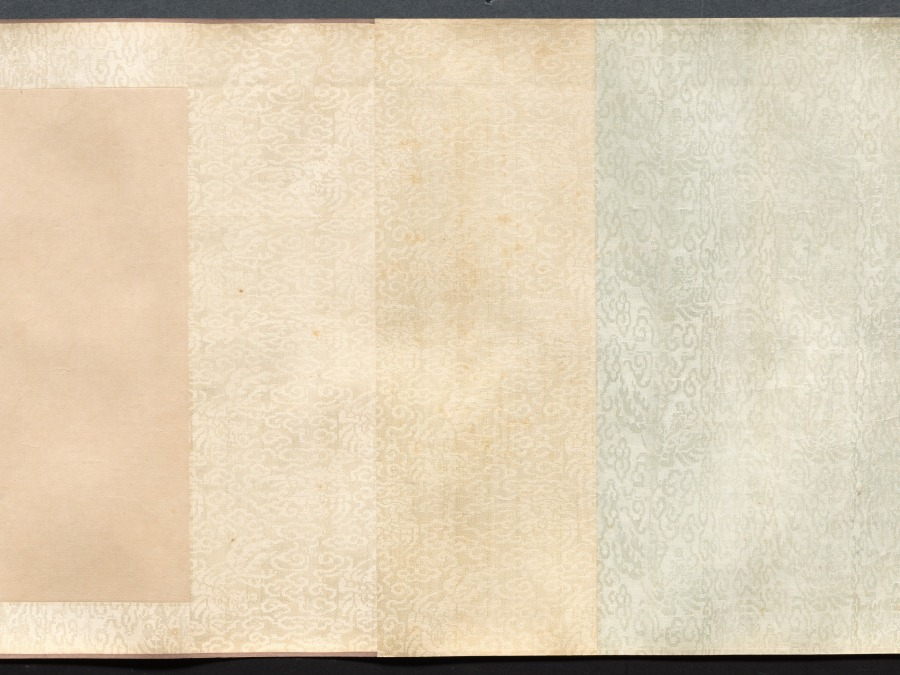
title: Four Poems: Calligraphy in Cursive Script (xingshu)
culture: China, Ming dynasty (1368–1644)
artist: Chen Jiru (Chinese, 1558–1639)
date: 1500s-1600s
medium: handscroll; ink on gold speckled paper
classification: Calligraphy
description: Written in graceful calligraphy with well-composed characters, the artist communicates his thoughts and state of mind in four poems. Characters written in dark, thick strokes convey rhythm, and indicate the moment after the writer had paused to recharge his brush with ink. Chen Jiru was a native of Huating (modern Shanghai). His calligraphy style resembles that of his friend, influential calligrapher Dong Qichang (1555–1636). Unlike Dong, Chen did not pursue government service: he burned his Confucian robes, declined a summons to serve at court, and immersed himself in literature, calligraphy, and painting.